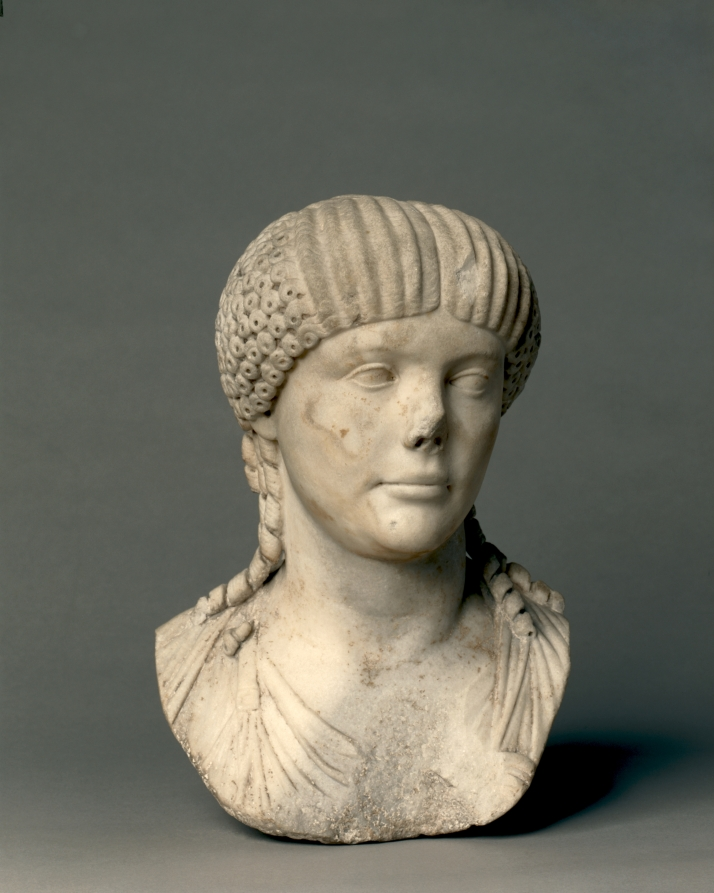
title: Portrait Bust of the Empress Claudia Octavia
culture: Italy, Roman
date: 50–70 CE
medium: marble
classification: Sculpture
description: This portrait bust depicts a young woman whose idealized features and elaborate hairstyle may identify her as the empress Claudia Octavia (r. AD 54-62), unfortunate first wife of the notorious emperor Nero. Over her tunic she wears a stola, a long garment hanging from both shoulders and distinguishing her as a married, upper-class woman. Although beloved by the Roman citizenry and described by the historian Tacitus as “aristocratic and virtuous,” Octavia was eventually divorced and banished by Nero, then ordered put to death.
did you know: The complex coiffure includes four elements: parted waves (top), tight curls (sides), hanging ringlets (shoulders, back), and a braided knot (back).